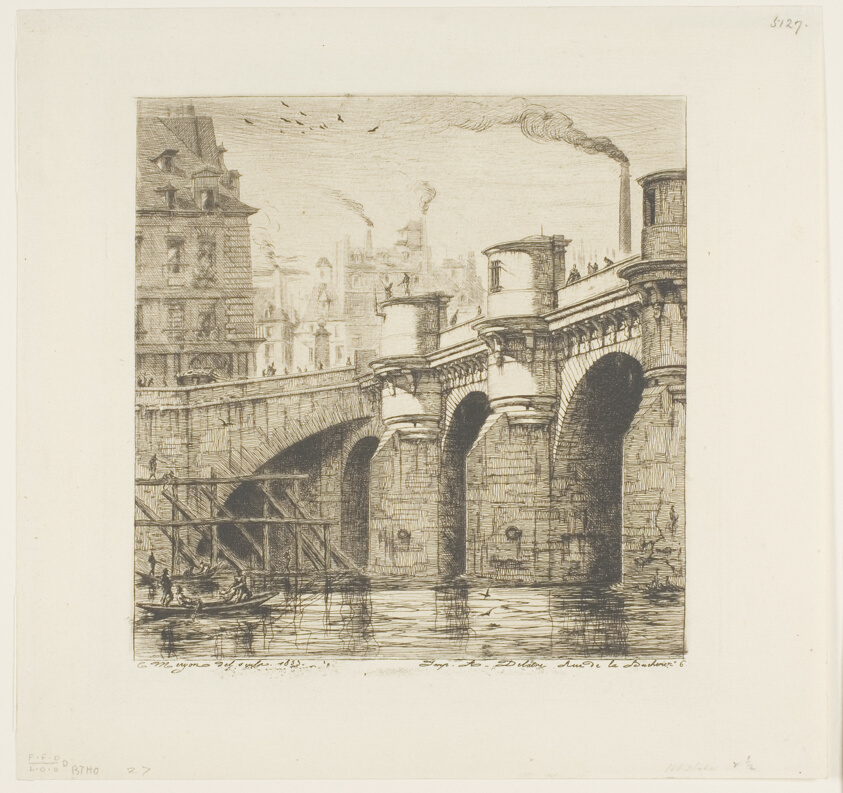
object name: Print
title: Pont-Neuf, Paris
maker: Charles Meryon (French, 1821-1868); printed by Auguste Delâtre (French, 1822-1907)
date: 1853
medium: Etching and drypoint on ivory laid paper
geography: France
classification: etching; print; prints and drawing